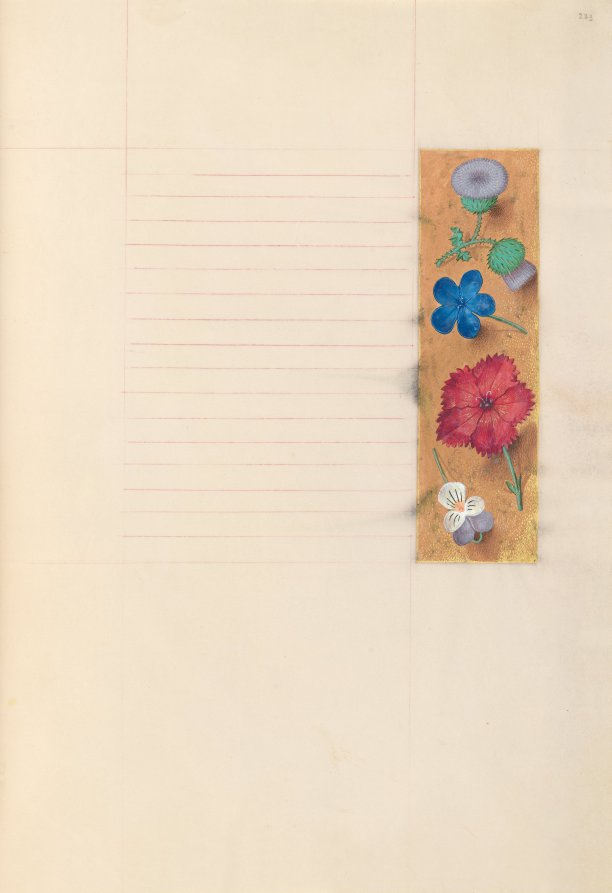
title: Hours of Queen Isabella the Catholic, Queen of Spain: Fol. 273r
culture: Flanders, Ghent and Bruges, late 15th century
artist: Master of the First Prayerbook of Maximillian (Flemish, c. 1444–1519)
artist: and Associates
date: c. 1500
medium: ink, tempera, and gold on vellum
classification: Bound Volume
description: This manuscript was illuminated by a circle of at least five highly organized manuscript painters active in the Flemish cities of Ghent and Bruges. The principal illuminator was Alexander Bening, who painted the majority of the book's miniatures. Manuscripts produced by this circle of artists are renowned for the decoration of their borders, which typically feature a rich variety of realistically-painted flowers, birds, and butterflies. This prayer book, called a book of hours, was intended not for a cleric, but for the private devotions of a lay person-in this case, Isabella the Catholic, Queen of Spain (1451-1504). Isabella's coat of arms embellishes the book's frontispiece. It is unlikely that the book was commissioned by the Queen herself; rather, she probably received it as a diplomatic gift from someone courting her patronage, perhaps Cardinal Francisco Jimenez de Cisneros. A Franciscan friar, Jimenez was dependent upon Isabella for his advancement, first to the post of Queen's confessor in 1492, and then to Archbishop of Toledo in 1495.